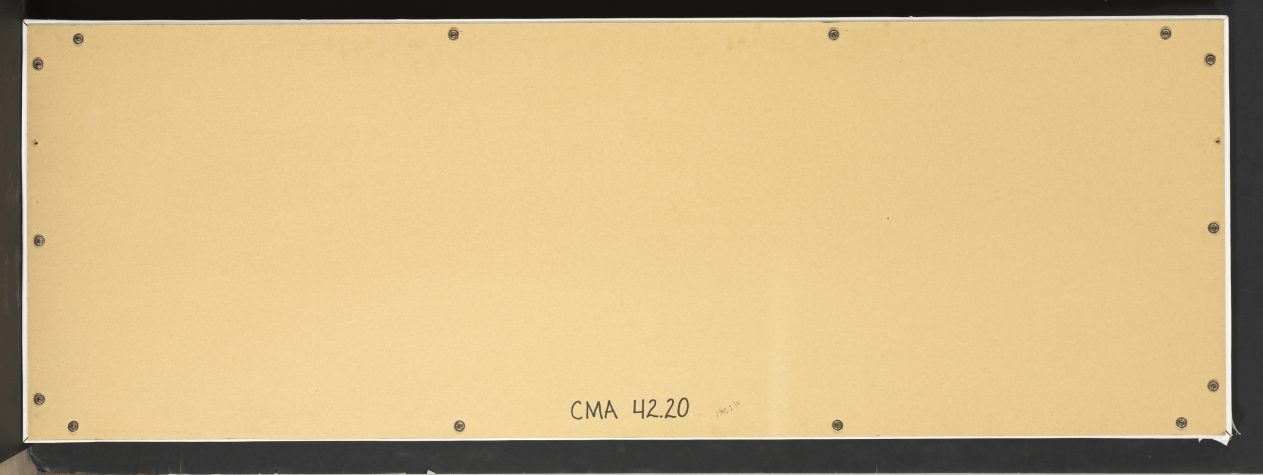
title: Overdoor Painting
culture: France, 18th century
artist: Pierre Rousseau (French, 1751–1829)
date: 1790s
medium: oil on canvas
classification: Painting